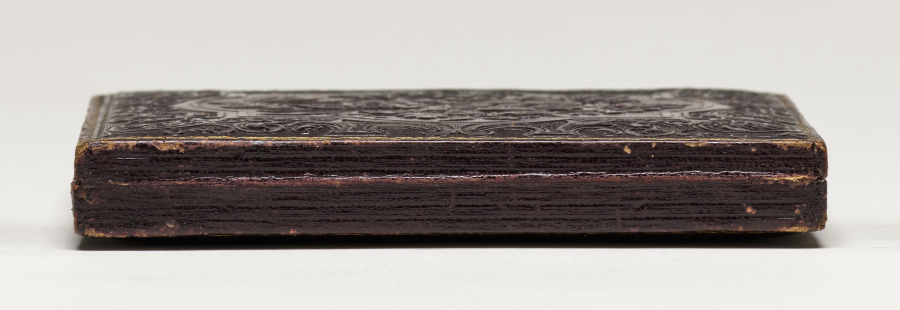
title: Dead Child On a Sofa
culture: America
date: c. 1855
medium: daguerreotype, applied color, quarter-plate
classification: Photograph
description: This carefully staged daguerreotype of a dead child is an outstanding example of a very common subject: the postmortem portrait. Using the stylistic conventions of the day, the unidentified artist successfully created a visually pleasing scene, despite the nature of the image. Dressed in white with a bouquet of flowers on the chest, the child, seen in profile, reclines on an elaborately patterned sofa. Delicate flesh tones were added to the cheek and arm, suggestive of a healthy child sleeping. The high rate of infant mortality throughout the 19th century made this variety of portraiture common, satisfying the emotional need of the parents to have a lasting memory of a loved one.